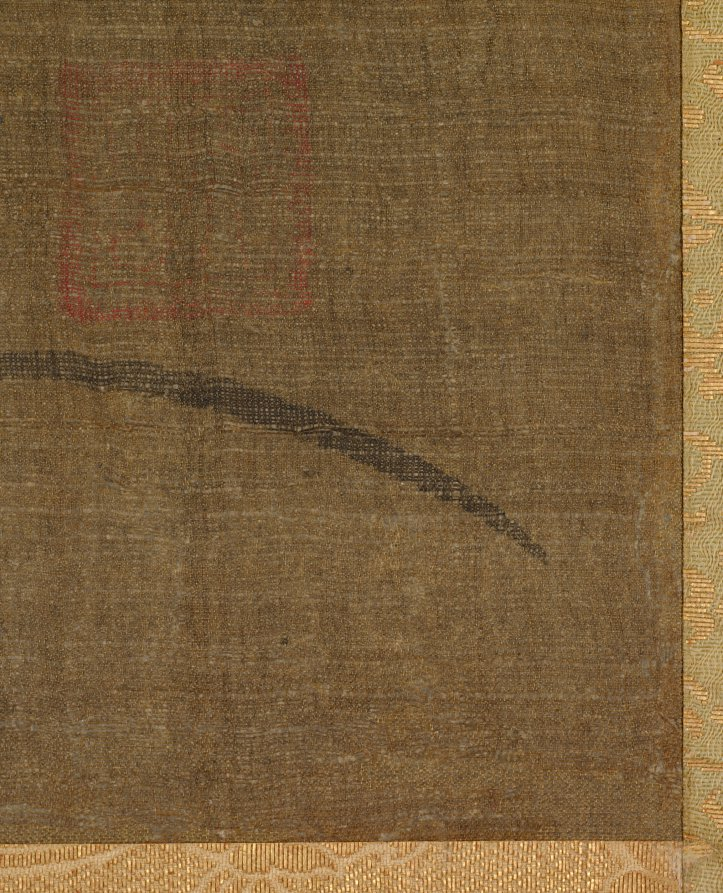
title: Dragon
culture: China, Southern Song dynasty (1127-1279)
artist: Fachang Muqi (Chinese, 1220–1280)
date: c. 1250–79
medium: Hanging scroll; ink on silk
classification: Painting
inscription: 道有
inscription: 雜華室印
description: The dragon and tiger are tied to the philosophical concept of yin and yang, which describes opposite but complementary forces. The dragon occupies a tiered background of waves and mist. Its luminous head emerges from the darker passages, and its narrow twisting body is serpent-like. By contrast, the close-up view of the tiger emphasizes its bulk. The tiger bends its head to lick its paw while its tail curls in the foreground. In their original Chan Buddhist context, this pair of scrolls likely flanked a central image, like the Bodhisattva Guanyin. The silk has darkened over the centuries, and the slight reddish shading in the tiger’s tongue and nose has faded.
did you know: Fachang Muqi was a Chinese Chan Buddhist monk and painter.